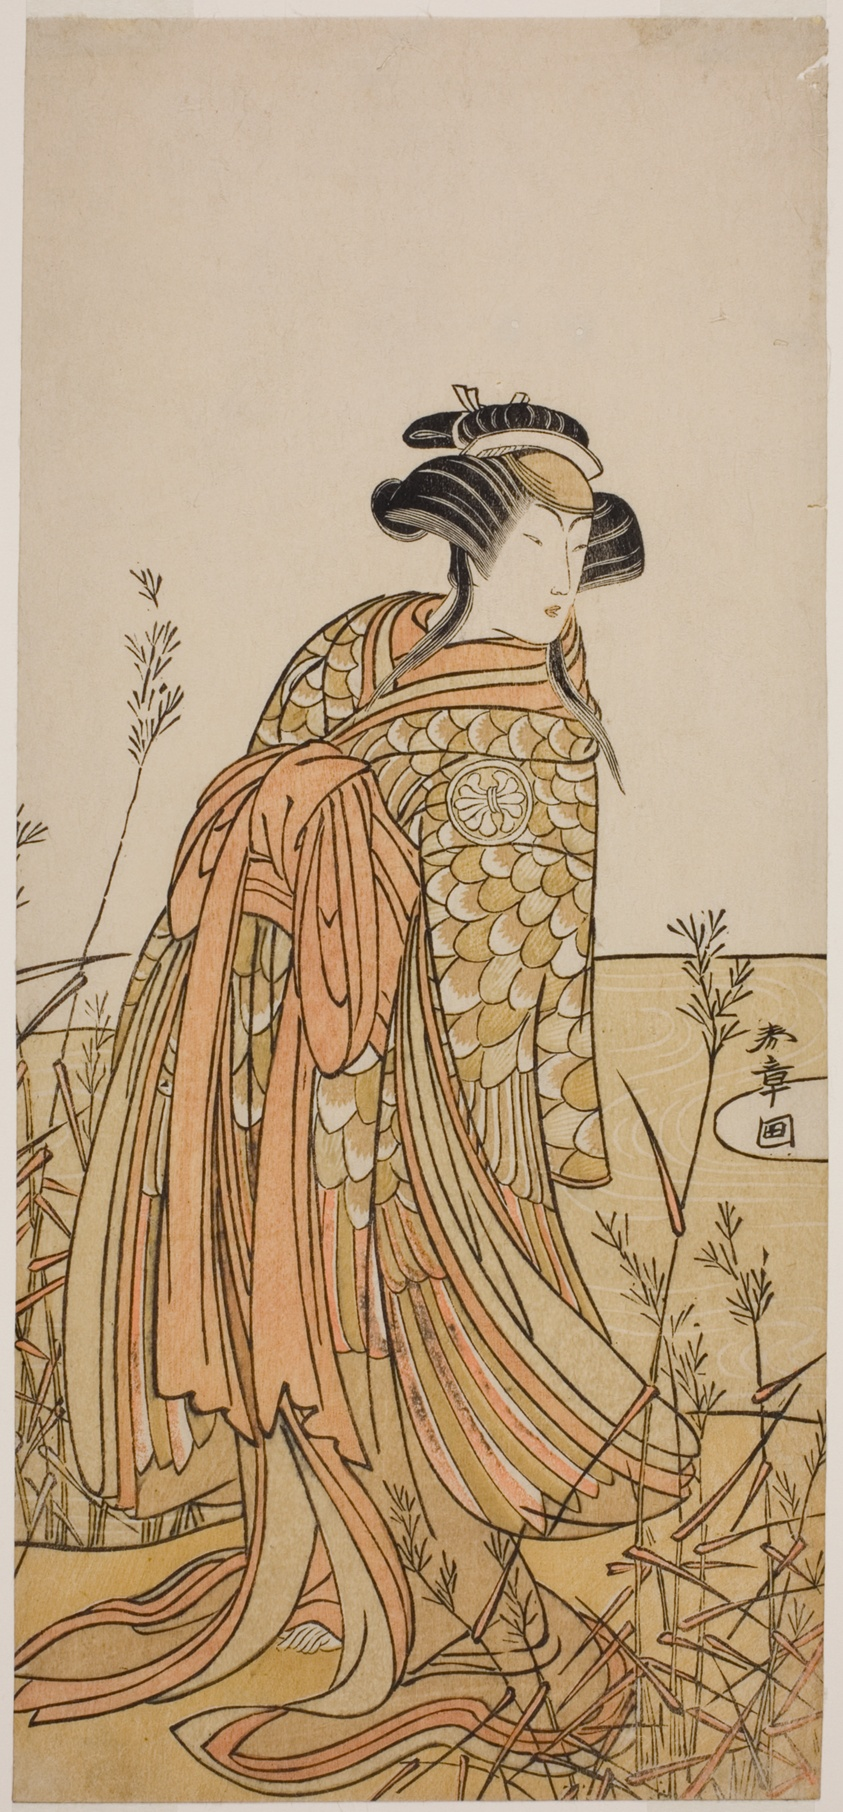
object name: Print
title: The Actor Segawa Kikunojo III as Spirit of a Mandarin Duck (Oshidori) Disguised as Tagasode, in the Play Hana-zumo Genji Hiiki, Performed at the Nakamura Theater in the Eleventh Month, 1775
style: Japanese (culture or style)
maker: Katsukawa Shunsho 勝川 春章; Japanese, 1726-1792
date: c. 1775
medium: Color woodblock print; hosoban; left sheet of diptych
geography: Japan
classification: woodblock print; print; asian art